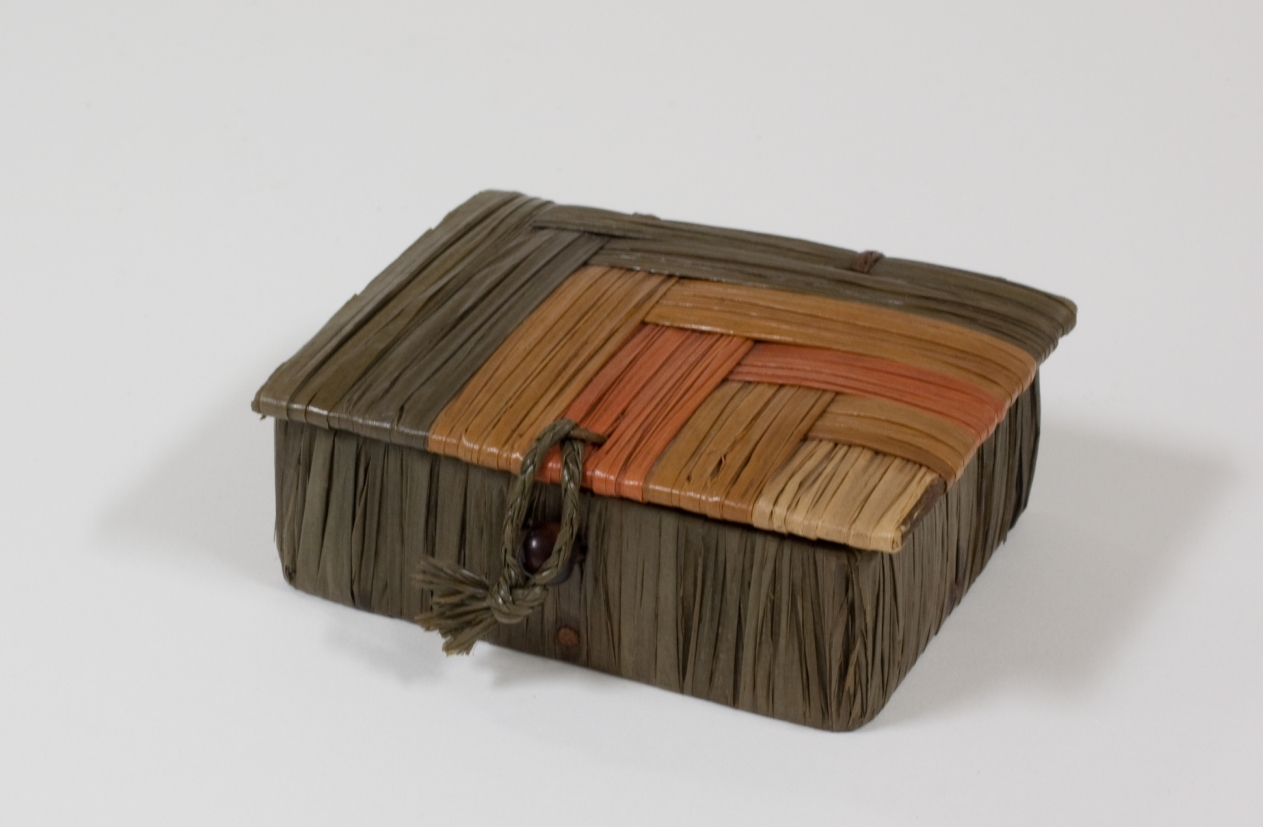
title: Raffia Box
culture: early 20th century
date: early 1900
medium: raffia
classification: Miscellaneous